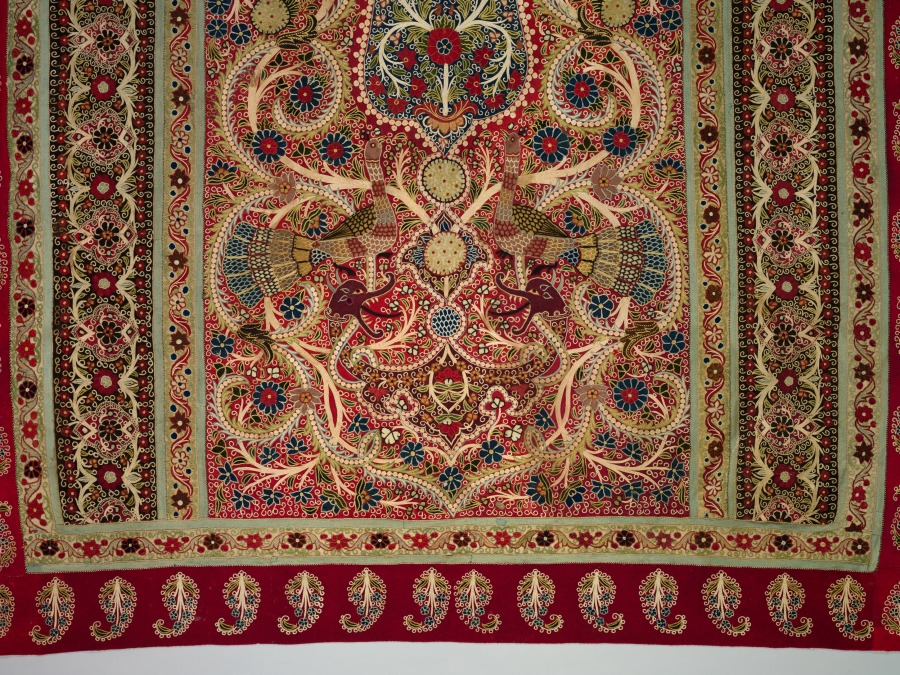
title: Tent Wall Panel(?)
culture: Iran, Rasht, Qajar period (1779-1925)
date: 1800s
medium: Wool: inlaid work; silk: embroidery, chain stitch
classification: Embroidery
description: Elaborate arched panels with multiple borders similar to this textile formed the mosaic-like interior walls of imperial tents. Here, the field is dominated by a richly decorated cypress tree above peacocks and dragon heads on an ornate foliate ground. We look upon the gardenscape through a niche (mihrab) formed by this foliage. Bright white silk “pearl” outlines, vines, and ringlets in chain-stitch embroidery enliven the pattern on contrasting colors of fulled wool. Internationally fashionable botehs, or paisleys, decorate the outer red borders.This technique has been referred to by many different names including: Rasht work, Resht work, Rashti-duzi, Rachti-douzi, embroidery applique, mosaic embroidery, piecework, patchwork, embroidery brocade, and inlaid patchwork. Many of these terms are to various degrees inaccurate descriptions of this technique. Perhaps the most practical term is Rasht work, named for the town in Iran where the technique was popularized. It begins as a ground of felted plain weave wool. Desired shapes are then punched out of the ground with a metal die and hammer. The same is done with wool of an alternating color. The edges of the different cut pieces are then embroidered together into various designs using a silk chain stitch (golab-duzi). Although this piecework technique was recorded in Iran in the 1670s, most examples survive from the 19th century, when foreigners praised them as “really [the] most beautiful embroidery.” The technique appears in furnishing fabrics, and horse covers, as well as imperial portraits, including one depicting the Qajar monarch Fath ‘Ali Shah, who ruled in 1797–1837. Sometime after leaving the workshop this panel experienced moth damage; small patches can be seen throughout.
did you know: Generally, Rasht work was made by men. Boys handled the delicate embroidering while older men designed cartoons and punched the wool designs.